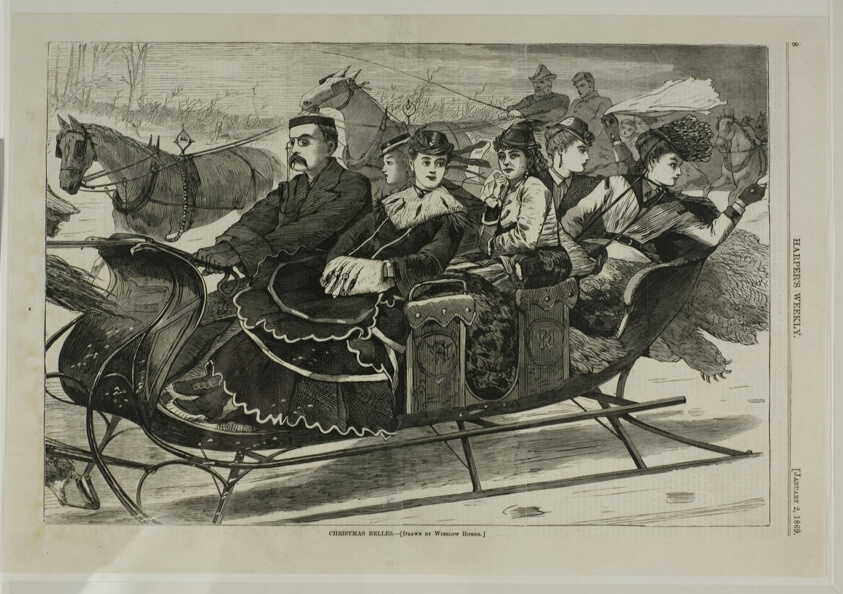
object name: Print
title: Christmas Belles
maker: Winslow Homer (American, 1836-1910); published by Harper's Weekly (American, 1857-1916)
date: published January 2, 1869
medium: Wood engraving on paper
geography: United States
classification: wood engraving; print; prints and drawing